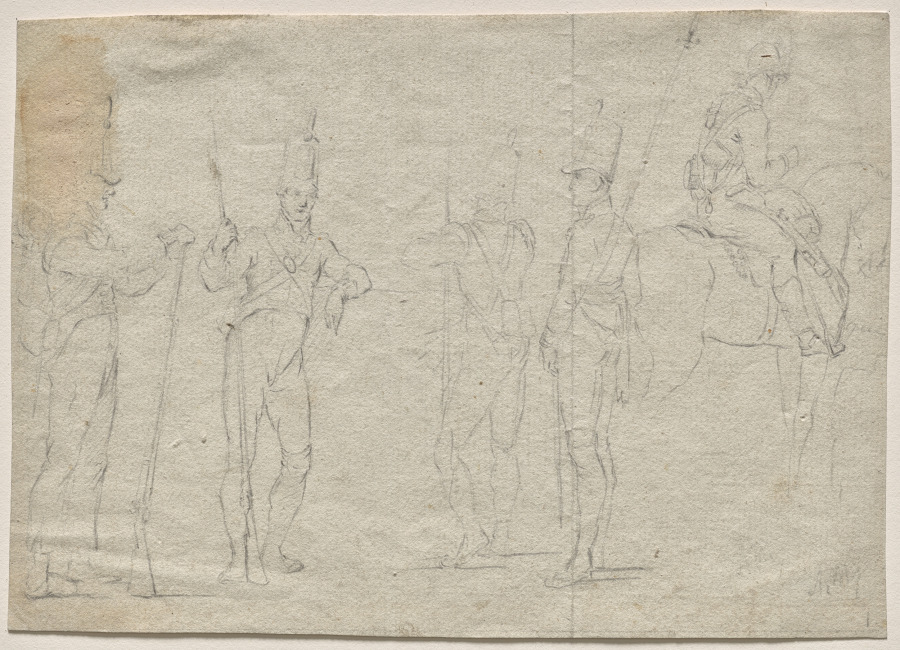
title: Soldiers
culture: Germany, 19th century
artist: Adolph von Menzel (German, 1815–1905)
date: second or last third 1800s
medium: graphite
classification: Drawing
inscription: signed?, lower right, in graphite: A M [parially erased] ; signed?, lower right, in graphite: A.M